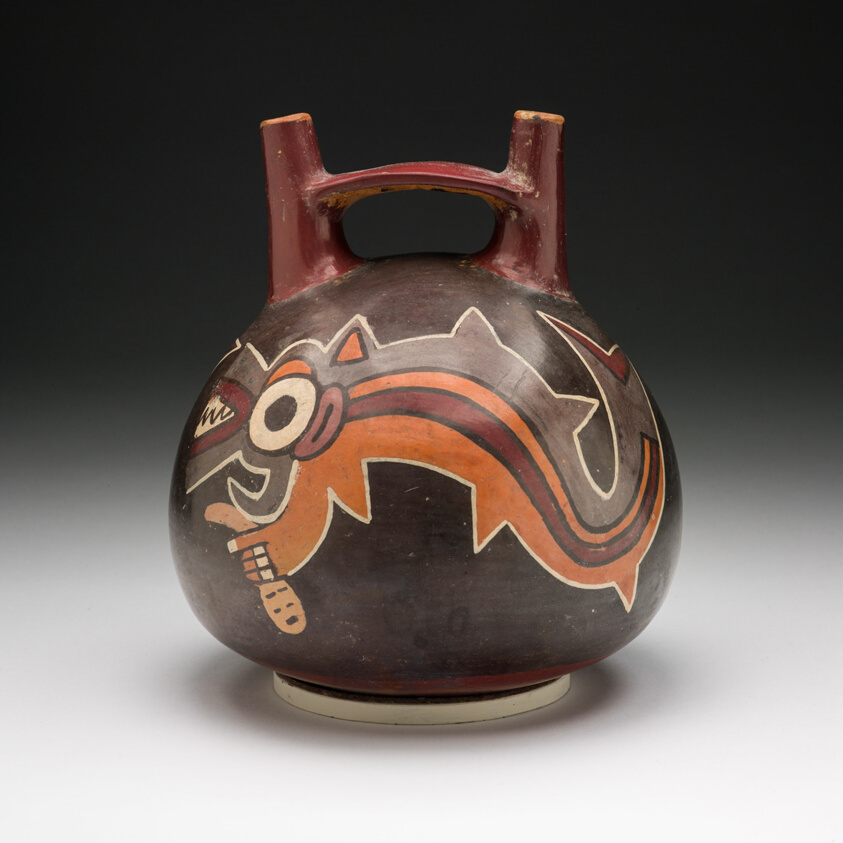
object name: Vessel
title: Vessel with Killer Whales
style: nazca, early intermediate period, Pre-Columbian, americas, andes, Arts of the Americas, andean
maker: Nazca; South coast, Peru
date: 100 BCE–500 CE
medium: Ceramic and pigment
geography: Peruvian South Coast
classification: earthenware; art of the americas; ceramics; vessel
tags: whale, animals, sacrifice, anthropomorphic figure, fish